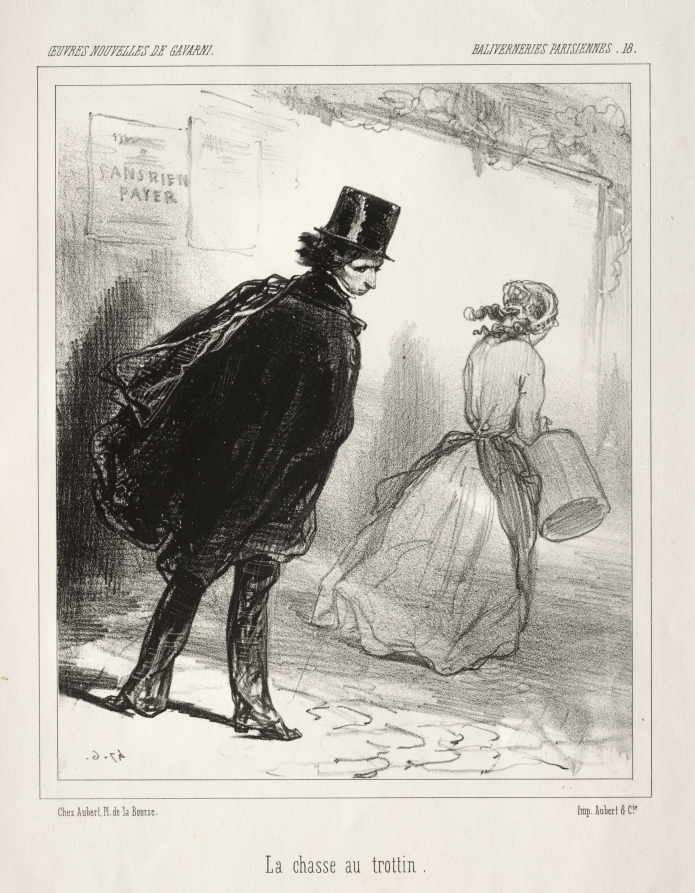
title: Baliverneries Parisiennes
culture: France, 19th century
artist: Paul Gavarni (French, 1804–1866)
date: c. 1847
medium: lithograph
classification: Print